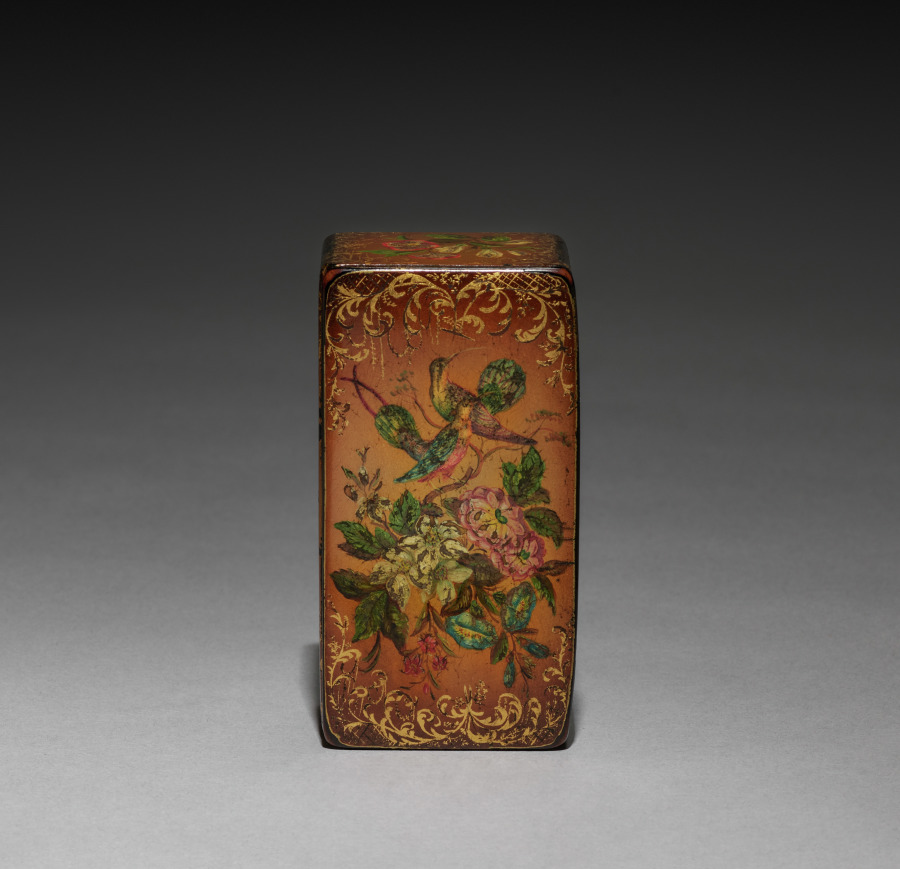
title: Box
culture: Russia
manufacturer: Lukutin Factory (Russian, 1818–1904)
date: 1830–81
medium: lacquered wood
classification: Miscellaneous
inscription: inscription on interior.